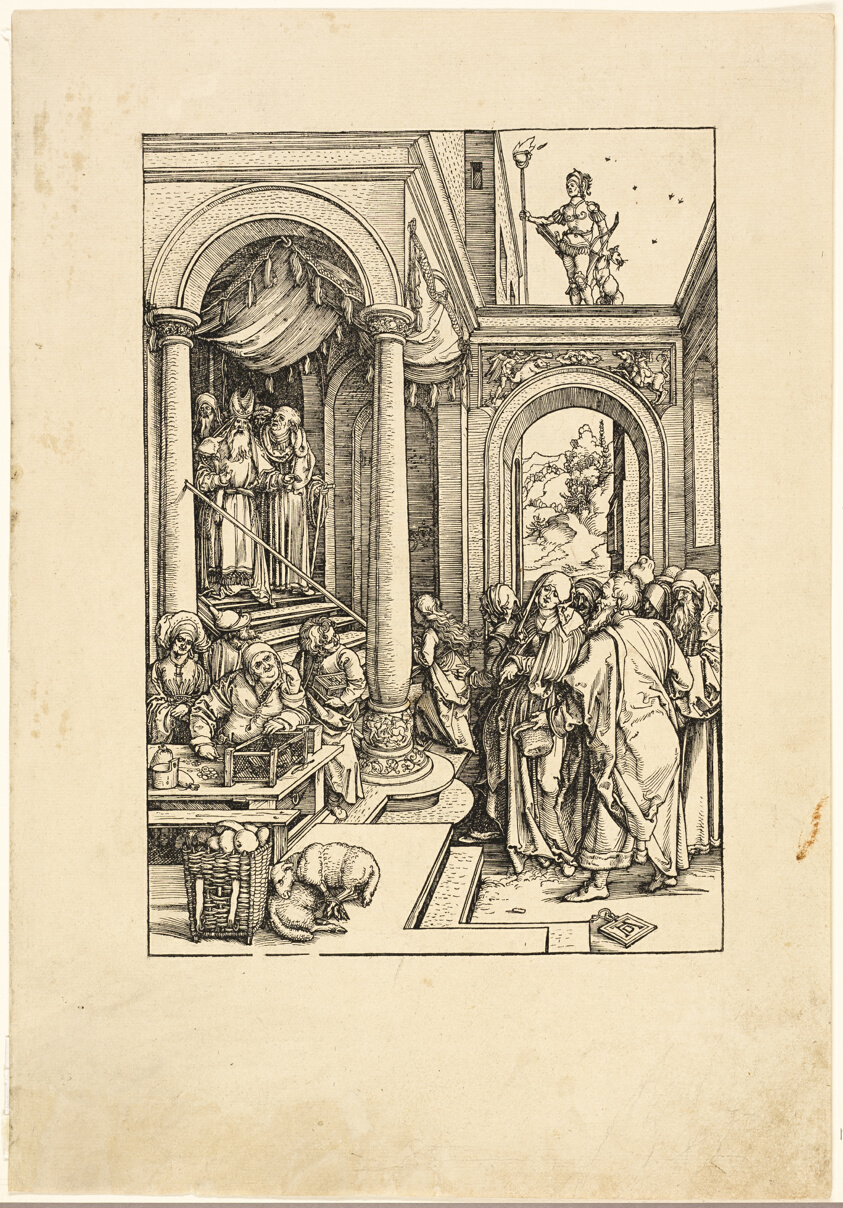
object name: Print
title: The Presentation of the Virgin in the Temple, from The Life of the Virgin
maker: Albrecht Dürer (German, 1471-1528)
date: c. 1503–04, published 1511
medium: Woodcut in black on tan laid paper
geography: Germany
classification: woodcut; print; prints and drawing; paper